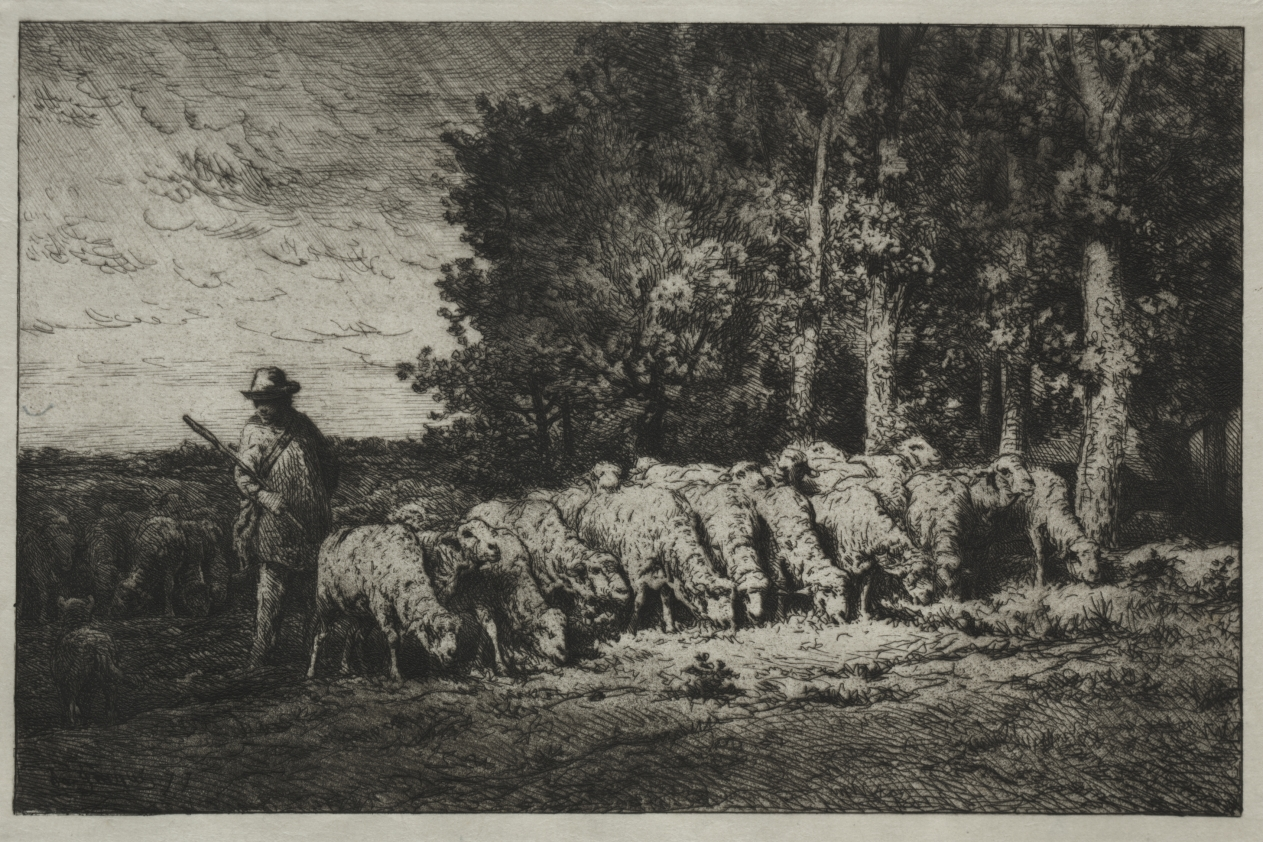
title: A Herd at the Edge of a Forest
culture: France, 19th century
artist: Charles-Émile Jacque (French, 1813–1894)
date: 1880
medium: etching and aquatint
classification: Print